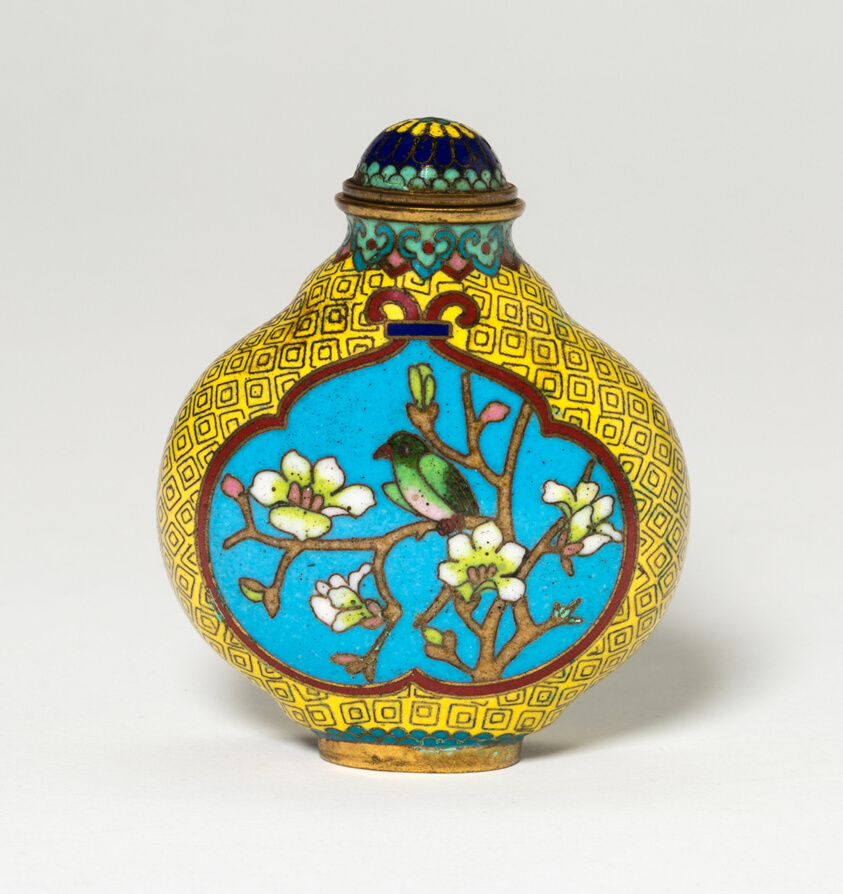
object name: Vessel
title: Snuff Bottle with Birds on Trees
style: Chinese (culture or style)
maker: China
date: Qing dynasty (1644–1911)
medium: Cloisonne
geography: China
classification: snuff bottle; metal; asian art; vessel